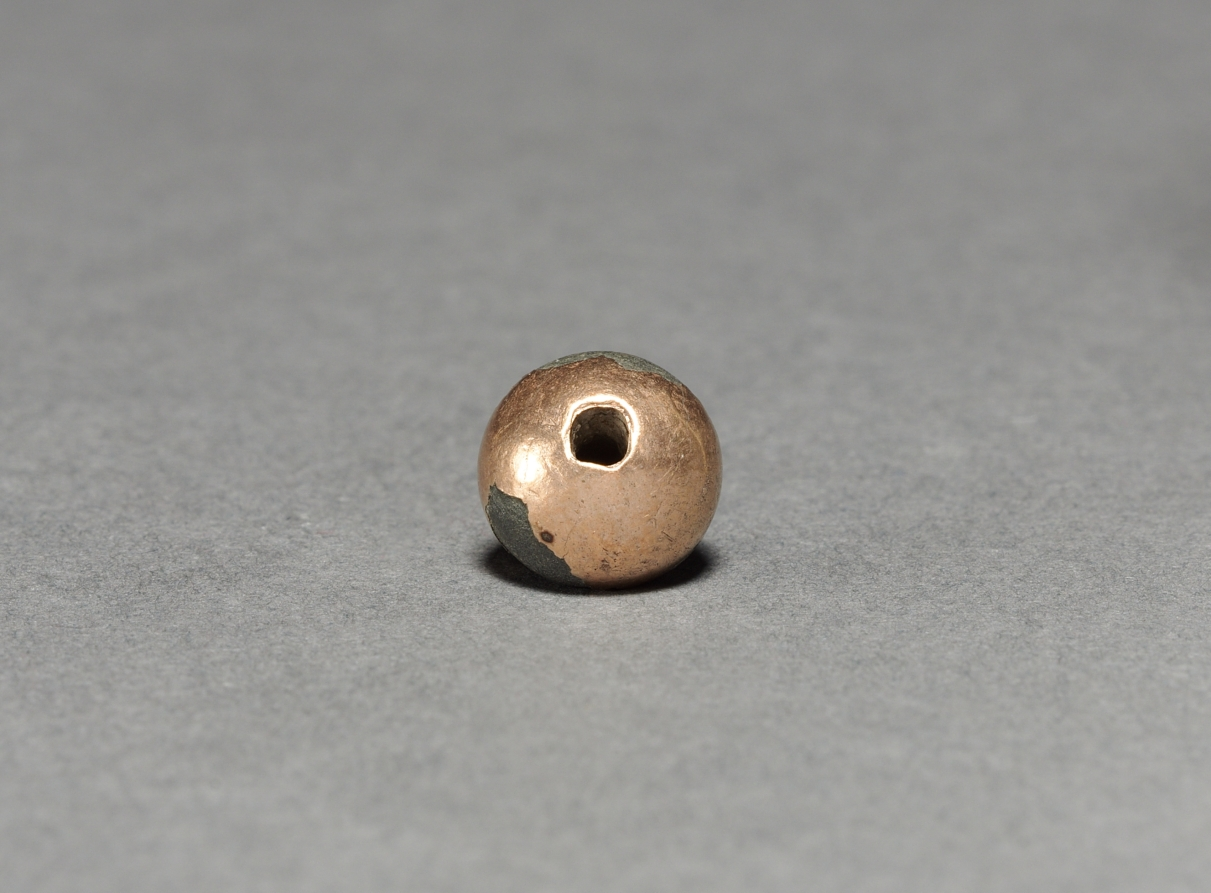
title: Bead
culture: Mexico, Oaxaca, Mixtec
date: 1200–1519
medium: clay covered with gold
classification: Jewelry